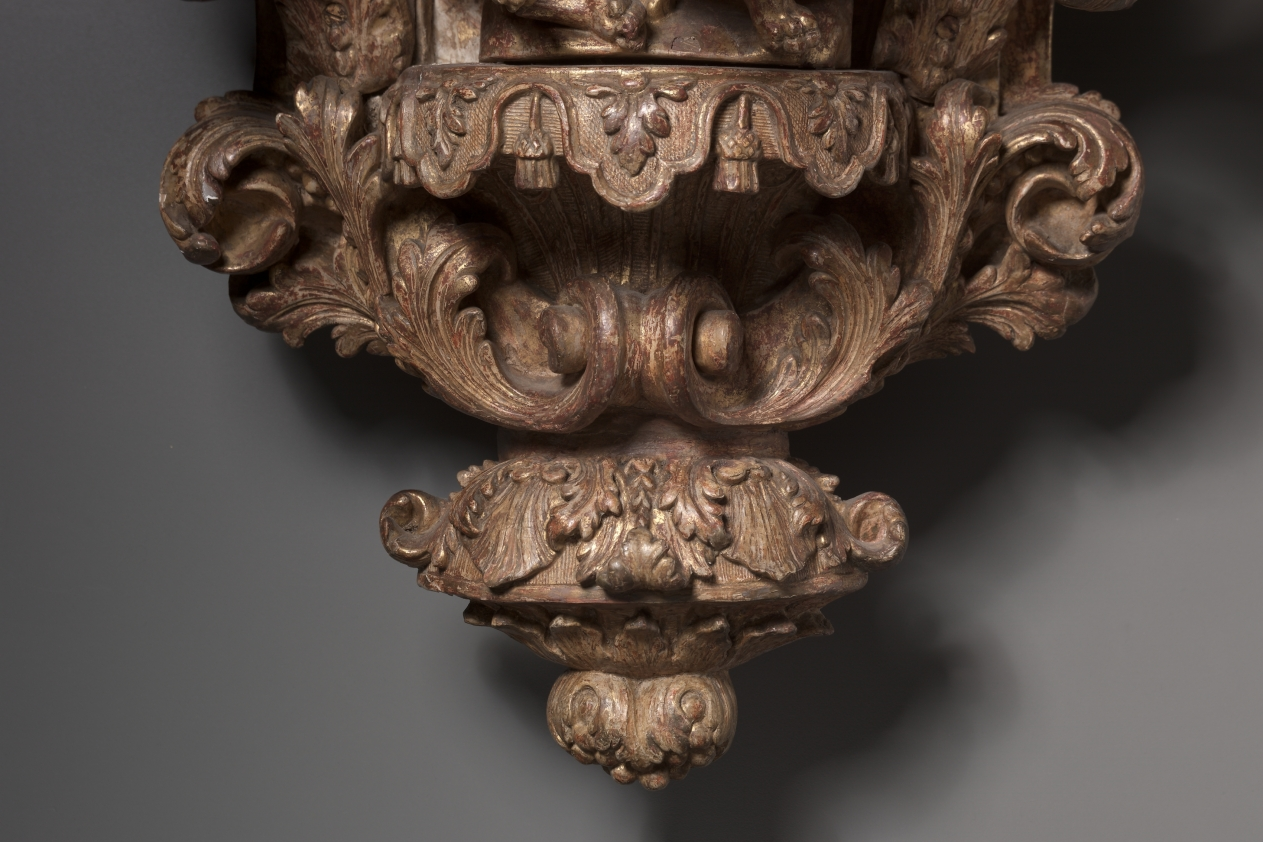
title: Wall Bracket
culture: France, 17th century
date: c. 1650–75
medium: carved and gilt wood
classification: Furniture and woodwork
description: The carved decoration depicts Hercules and the Nemean lion.